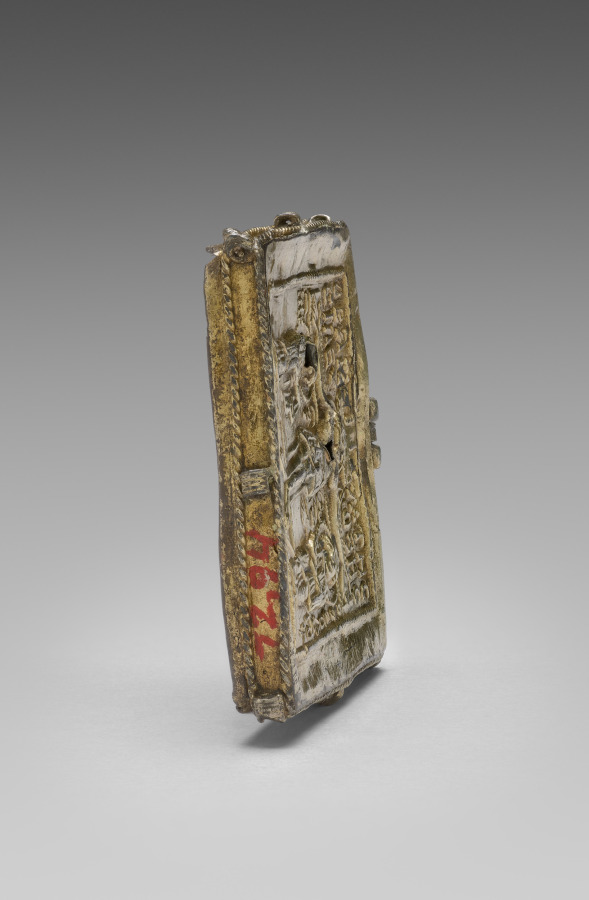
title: Enkolpion with the Crucifixion (front) and Saints Theodore and George (back)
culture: Byzantium, Constantinople, Byzantine period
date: 1080–1120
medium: silver gilt and cloisoné enamel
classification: Metalwork